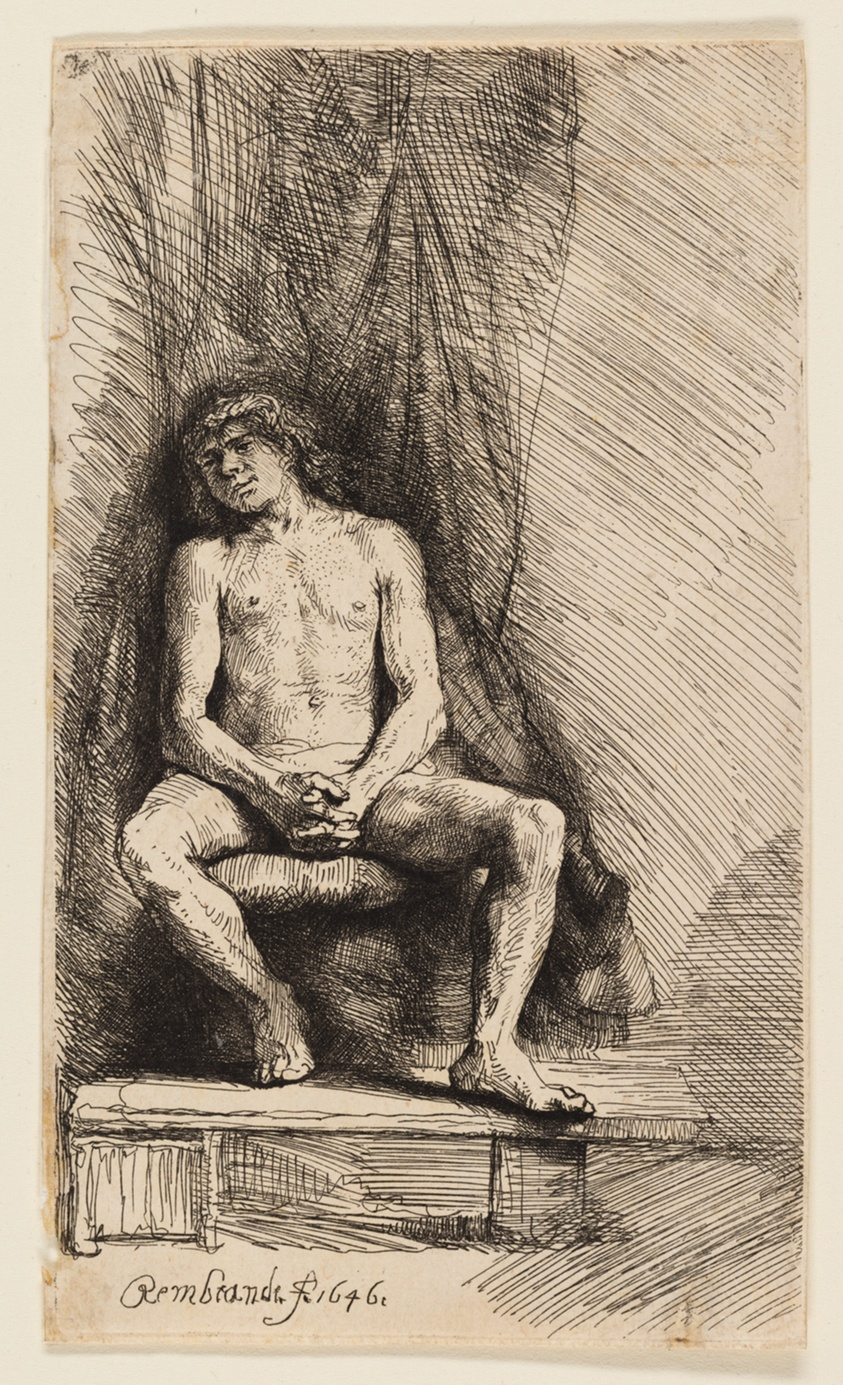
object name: Print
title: Nude Man Seated before a Curtain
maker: Rembrandt van Rijn (Dutch, 1606-1669)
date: 1646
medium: Etching on ivory laid paper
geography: Holland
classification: etching; print; prints and drawing; paper